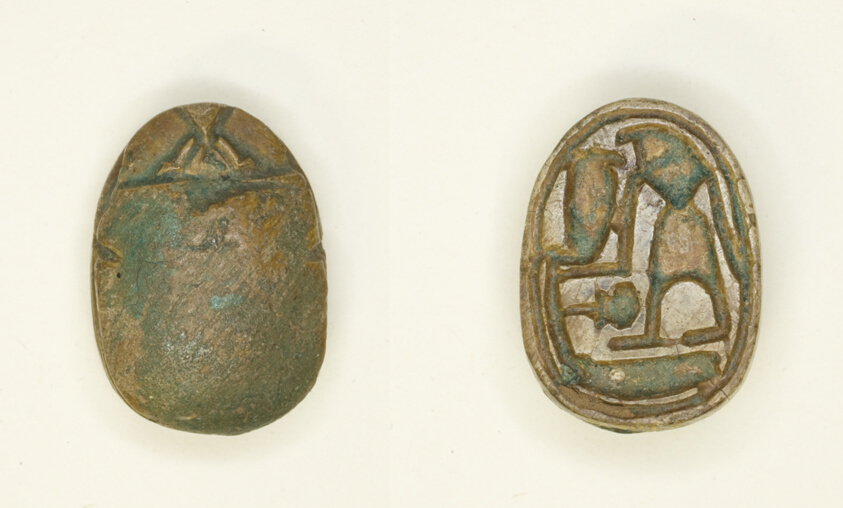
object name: Costume and Accessories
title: Scarab: Falcon-Headed Deity with Cobra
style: second intermediate period, egyptian, ancient, eighteenth dynasty, fifteenth dynasty, new kingdom, nineteenth dynasty, seventeenth dynasty, sixteenth dynasty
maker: Egyptian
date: Second Intermediate Period–New Kingdom, Dynasties 15–19 (about 1650–1186 BCE)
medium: Steatite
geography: Egypt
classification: scarab; ancient art; costume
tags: gods (deities), Hieroglyphs, insects